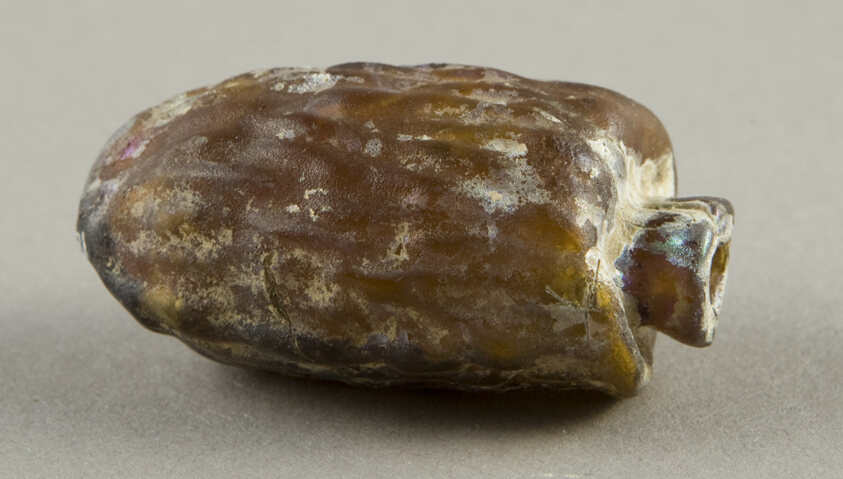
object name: Vessel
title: Flask in the Shape of a Date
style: roman (ancient, style or period)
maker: Roman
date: 1st century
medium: Glass, mold-blown technique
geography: Greece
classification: glass; vessel; ancient art